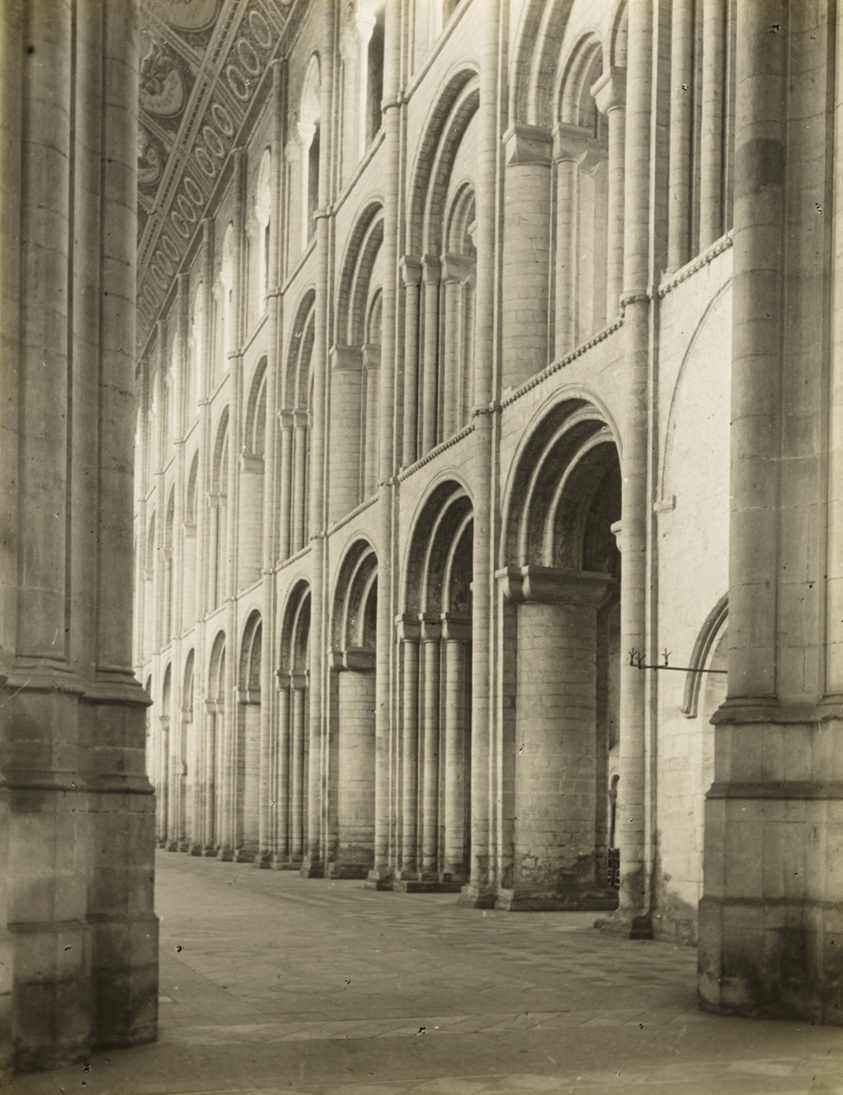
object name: Photograph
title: Ely Cathedral: Nave from under West Tower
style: Pictorialism, 19th century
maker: Frederick H. Evans (English, 1853–1943)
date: c. 1891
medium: Lantern slide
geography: England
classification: photograph; photography